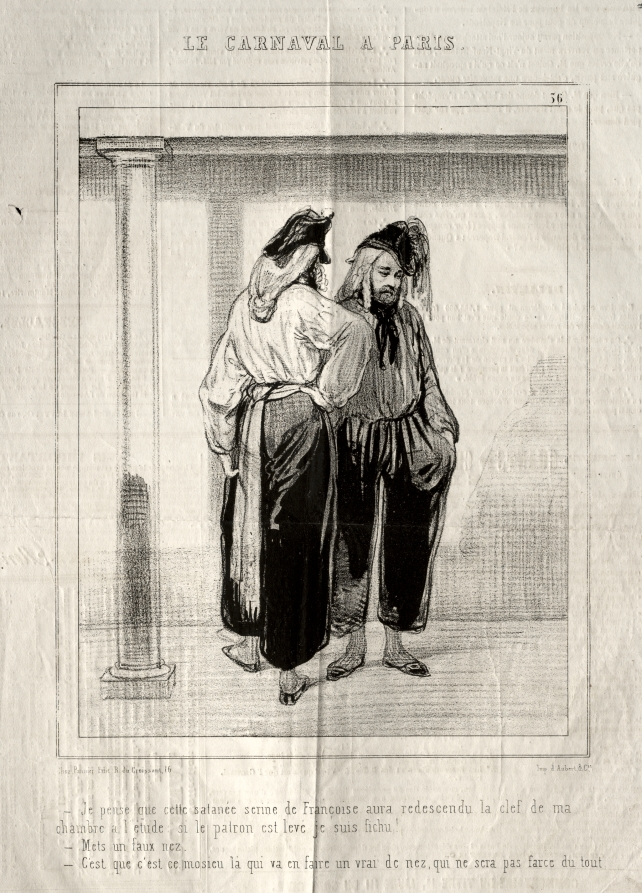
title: Carnaval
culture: France, 19th century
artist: Paul Gavarni (French, 1804–1866)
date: 1841–1843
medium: lithograph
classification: Print